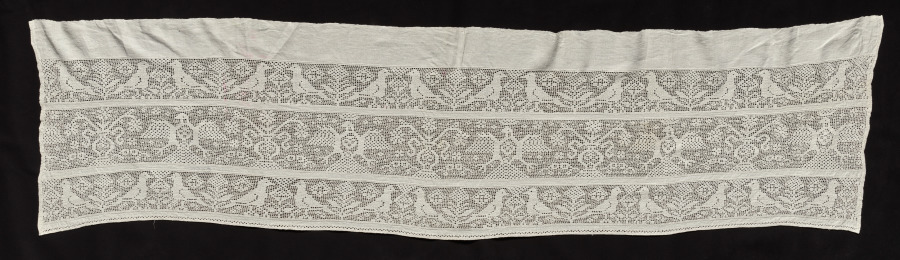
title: Three Joined Bands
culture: Italy, 1800s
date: 1800s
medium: Linen: needle lace (drawnwork)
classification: Lace